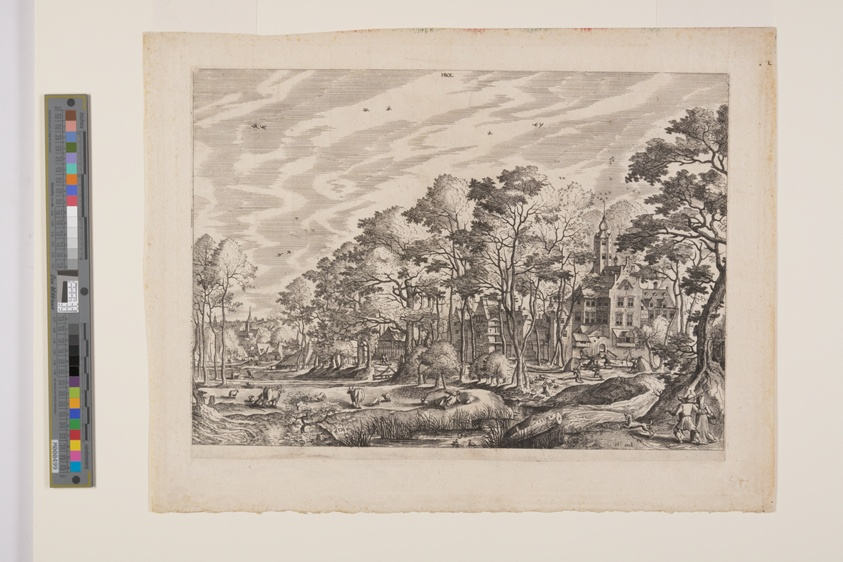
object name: Print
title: View of a Village with a Castle to the Right, plate 1 from Landscapes with Views of Villages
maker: Hans Bol (Flemish, 1534–1593)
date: 1562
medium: Etching on ivory laid paper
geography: Flanders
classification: print; paper; prints and drawing; etching